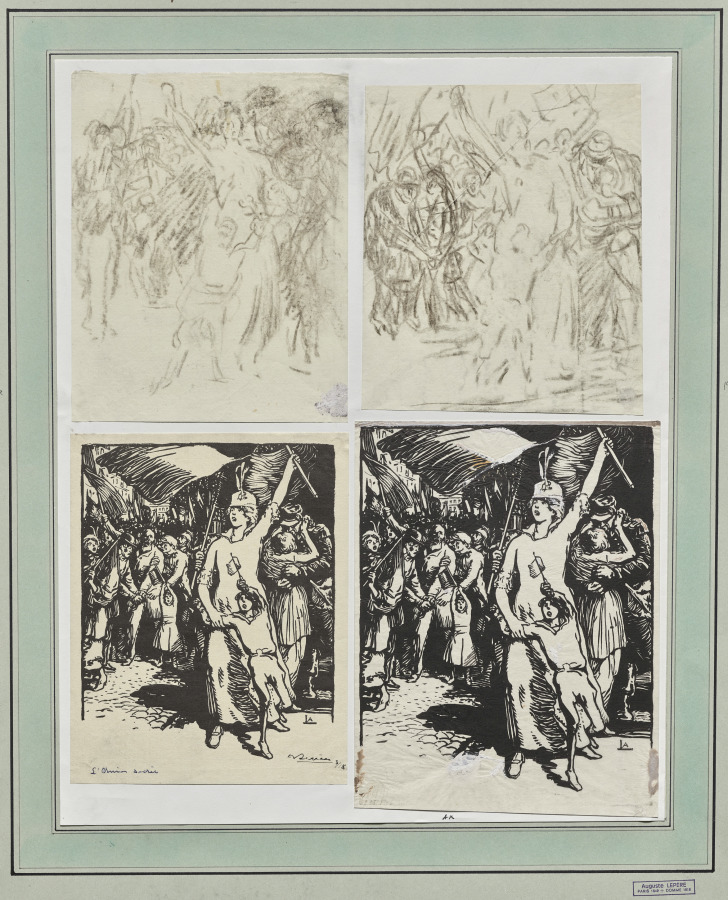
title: L'Union sacrées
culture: France, 20th century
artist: Auguste Louis Lepère (French, 1849–1918)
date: 1914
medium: black crayon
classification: Drawing